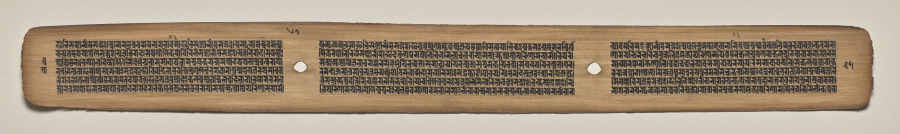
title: Text, Folio 67 (verso), from a Manuscript of the Perfection of Wisdom in Eight Thousand Lines (Ashtasahasrika Prajnaparamita-sutra)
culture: Eastern India, Bihar, Vikramashila Monastery. Painting: Nepal, Kathmandu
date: Sunday, September 14, 1119 (year 239 of the Newar Samvat in the month of Ashvina)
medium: gum tempera and ink on palm leaves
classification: Painting